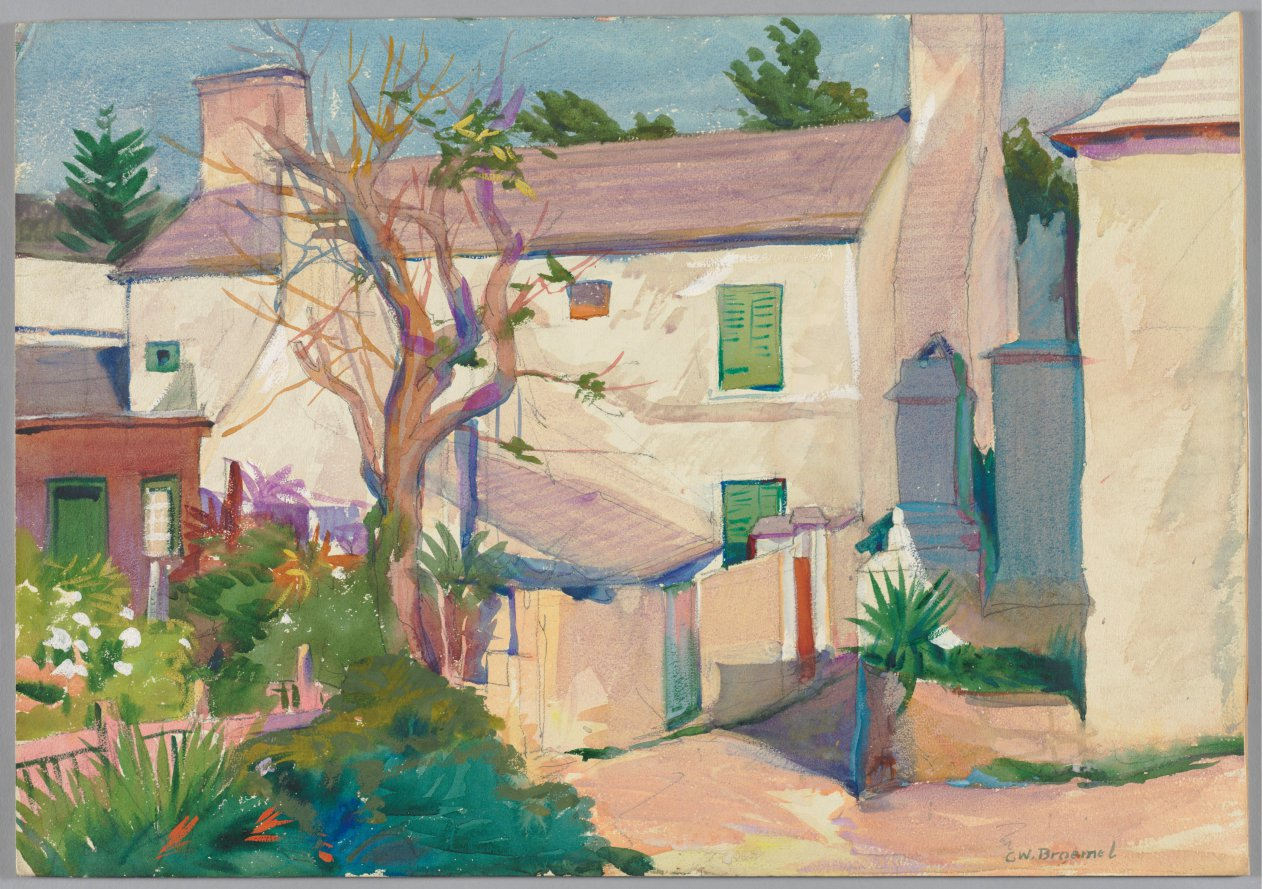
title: St. George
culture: America, Ohio, Cleveland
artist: Carl William Broemel (American, 1891–1984)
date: 1924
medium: watercolor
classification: Drawing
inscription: Signed C.W. Broemel, Bermuda in lower right corner